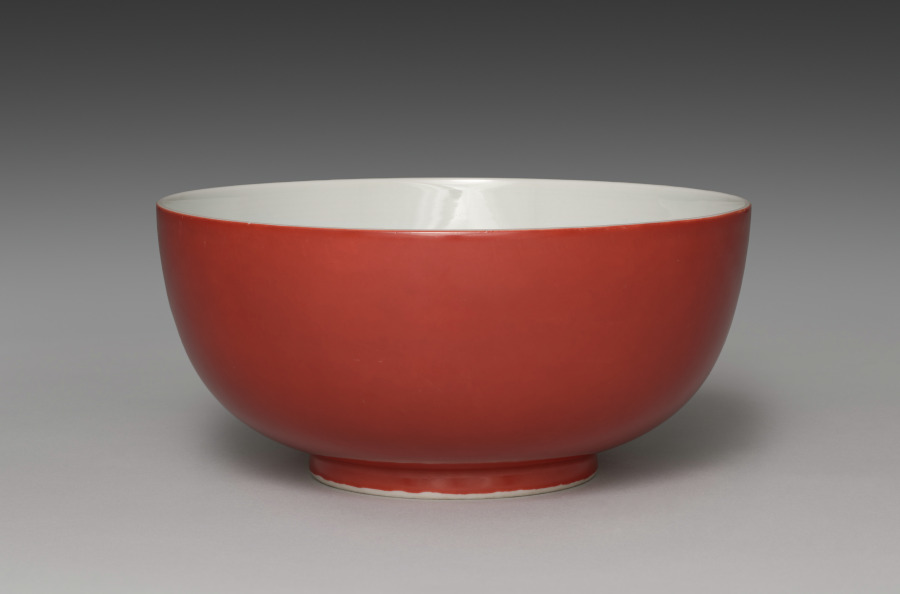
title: Sweets Bowl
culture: Japan, Taishō period (1912–26) or Shōwa period (1926–89)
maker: Seifū Yohei IV (Japanese, 1872–1951)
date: 1914–46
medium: Porcelain with coral red glaze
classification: Ceramic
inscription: 清風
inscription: 成山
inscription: 清風造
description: Like his father, Yohei IV also produced works with red monochrome glazes, like this red coral–glazed sweets bowl with white interior.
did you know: Seifū Yohei IV was active at home and abroad and won international recognition for his ceramic's glazes and designs.